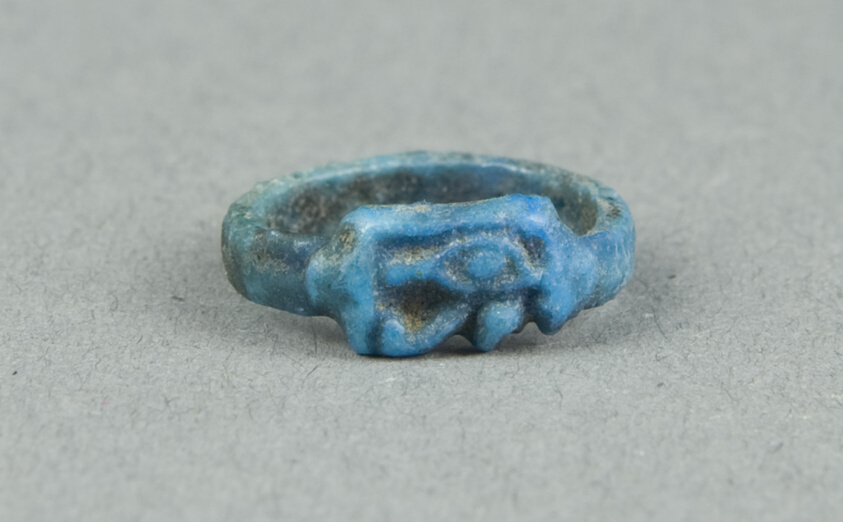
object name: Costume and Accessories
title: Eye of Horus (Wedjat) Finger Ring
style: new kingdom, egyptian, ancient, eighteenth dynasty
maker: Egyptian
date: New Kingdom, late Dynasty 18 (about 1325 BCE)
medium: Faience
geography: Egypt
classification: ring (jewelry); ceramics; jewelry; ancient art; costume; faïence (composite material)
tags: eye of Horus